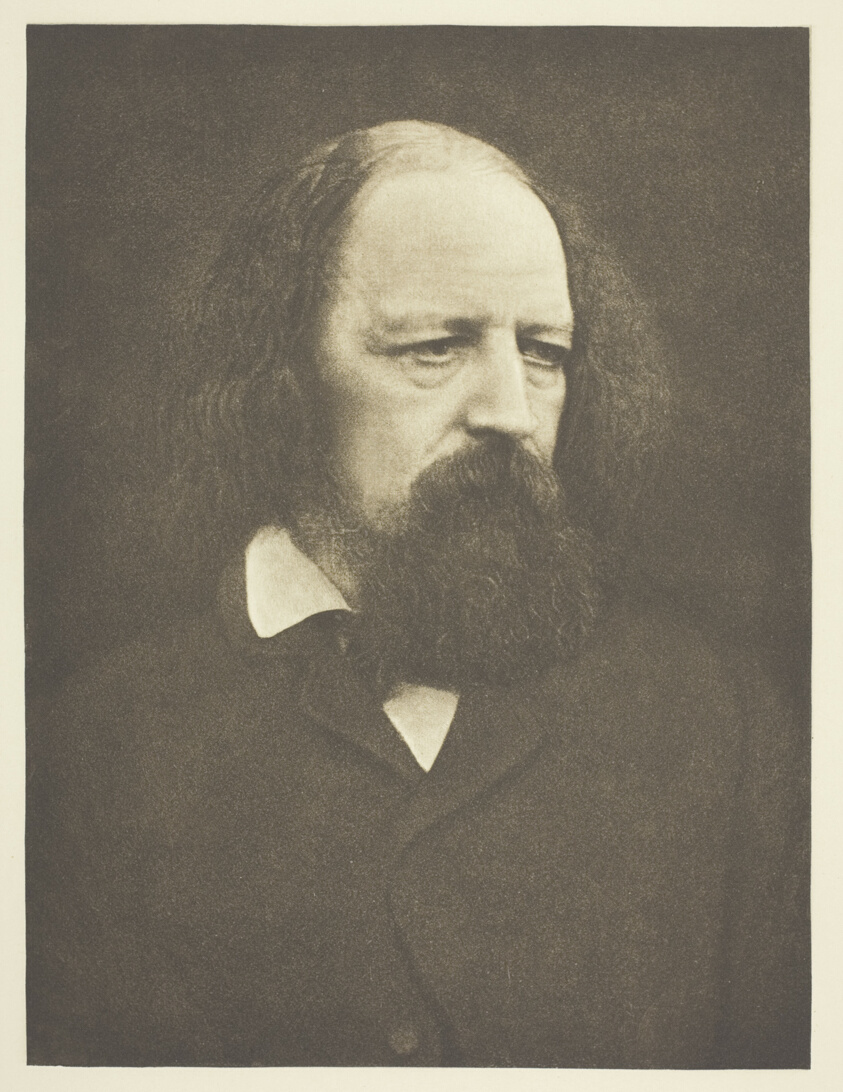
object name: Photograph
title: Lord Tennyson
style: 19th century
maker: Julia Margaret Cameron (English, 1815–1879)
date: 1867, printed October 1890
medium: Photogravure, from "Sun Artists, Number 5" (1890)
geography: England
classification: photogravure; photomechanical process; photography; photograph